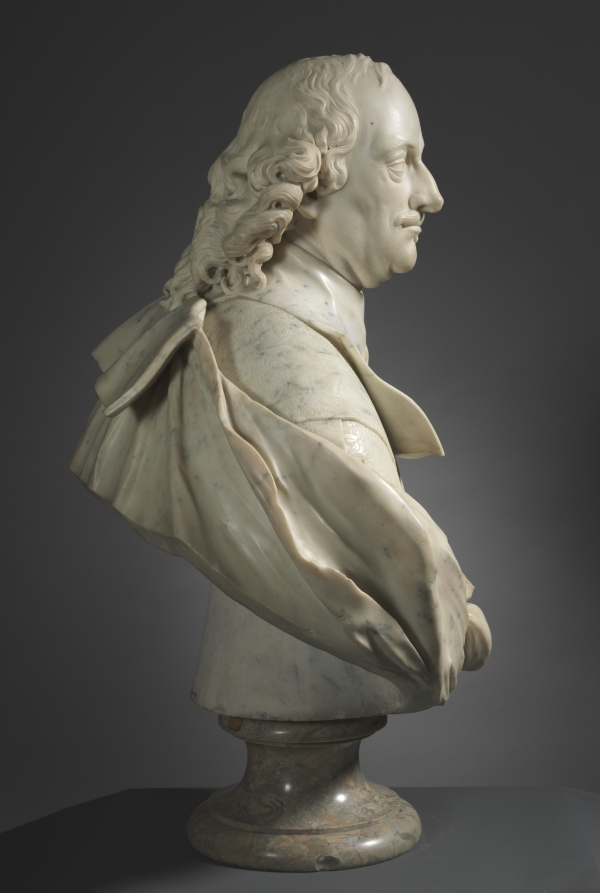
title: Portrait of Fabrizio Naro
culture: Italy, Rome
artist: Domenico Guidi (Italian, 1625–1701)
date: c. 1680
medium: marble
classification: Sculpture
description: This figure’s individualized facial expression, dynamic turn of the head and animated drapery are all characteristic of 17th-century Roman portrait sculpture. Guidi, a pupil of Alessandro Algardi, juxtaposed broad swaths of drapery and deeply drilled and carved hair with delicate surface detail, visible here in the patterning of the jacket and the faint suggestion of a beard. Based on a comparison with a later portrait on the family tomb in the church of Santa Maria sopra Minerva, Rome, the sitter has been identified as Fabrizio Naro (d. 1697), marquis of Mompei.